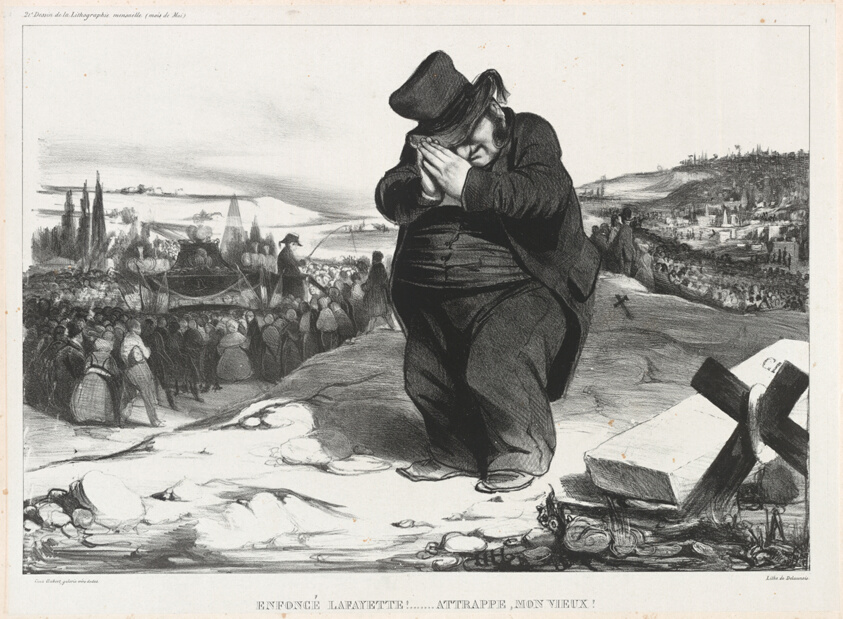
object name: Print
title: Crushed Lafayette!... Trapped, Old Fellow!, plate 22 from L’Association mensuelle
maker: Honoré Victorin Daumier; French, 1808-1879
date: 1834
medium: Lithograph in black on white China paper, laid down on cream wove paper (chine collé)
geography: France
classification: lithograph; print; prints and drawing